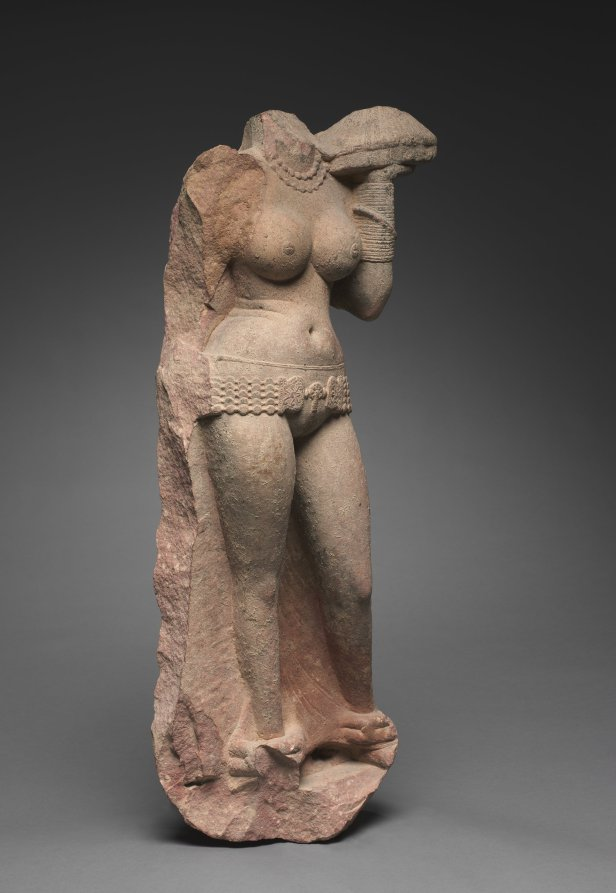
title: Female Devotee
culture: India, Mathura, Kushan period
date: c. early 100s CE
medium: sandstone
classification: Stone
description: This female devotee is depicted approaching the place of worship carrying a covered wicker tray that would have been filled with fresh flower garlands.The sense of dynamism and power in the stance, the masterful transformation of stone into the suppleness of youthful, voluptuous flesh barely interrupted by clothing, as well as touches of naturalism—seen in the slipping of the large bangle down the spiral cuff—are all stylistic characteristics of female figures made during the early 2nd century.